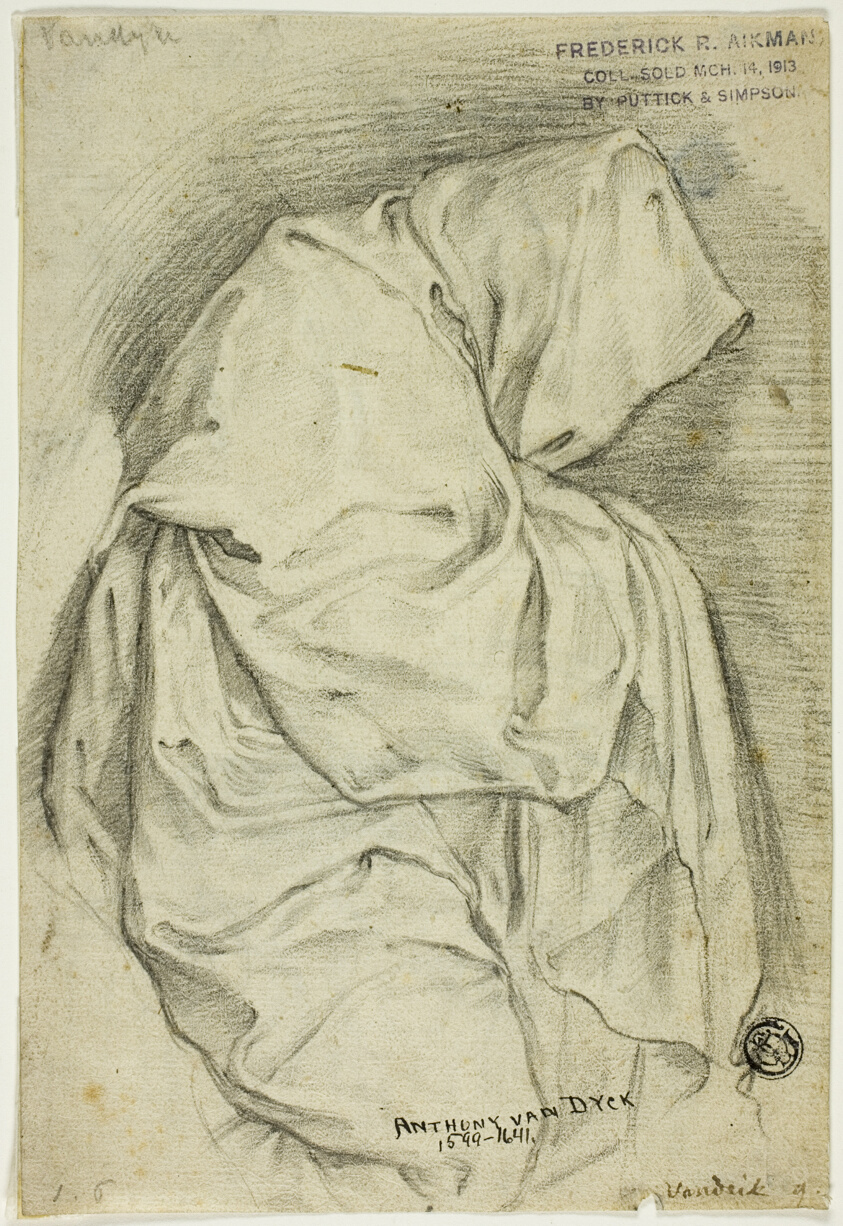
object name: Drawing and Watercolor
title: Draped with Hooded Figure (recto); Two Sketches of Swans in Water (verso)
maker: Possibly Anthony van Dyck (Flemish, 1599-1641); or the school of Peter Paul Rubens (Flemish, 1577-1640)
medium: Black chalk (recto and verso) on ivory laid paper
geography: Flanders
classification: drawings (visual works); prints and drawing